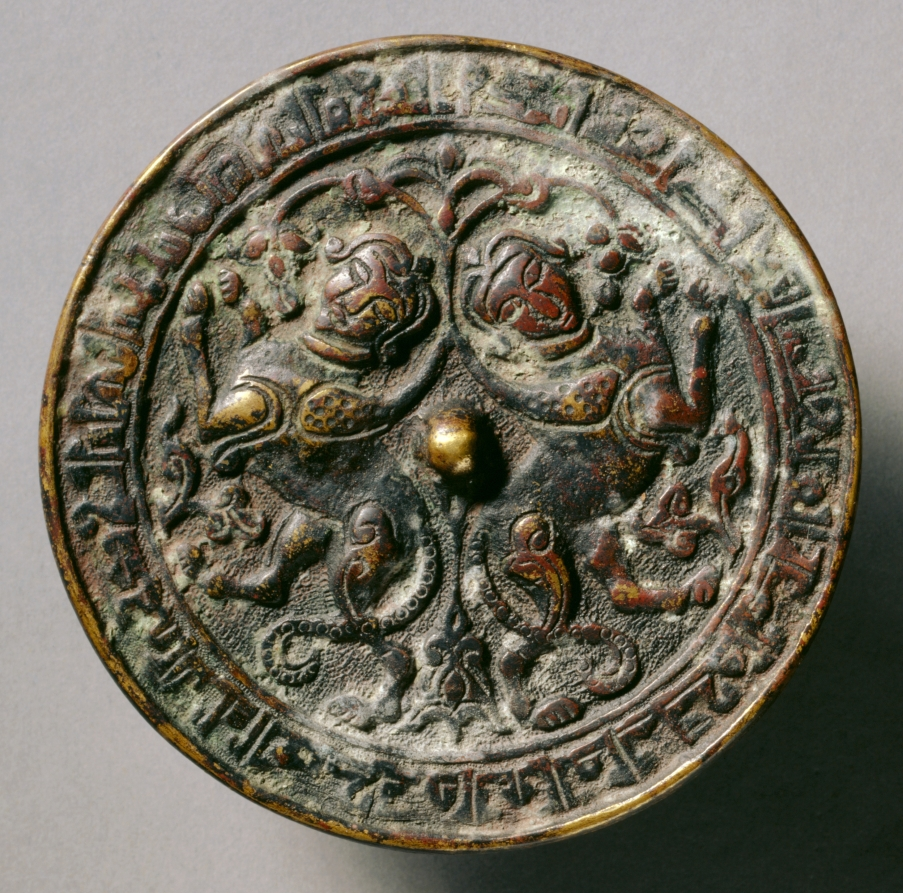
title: Mirror with Addorsed Sphinxes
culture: Eastern Anatolia or Northern Mesopotamia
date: 1200s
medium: Cast bronze with relief decoration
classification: Metalwork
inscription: Arabic inscription in degenerate floriated angular script around rim. Inscription is poorly written, but is identical to that on mirrors in Kuwait al-Sabah Collection (LNS102M) and Musée des Arts Decoratifs (14918). Translation (from M. Jenkins, "The al-Sabah Collection," 1983, p. 69): Glory and continence and good fortune and splendor and high position and praise and happiness and nobility and power and increase and potency and blessings to its owner forever.